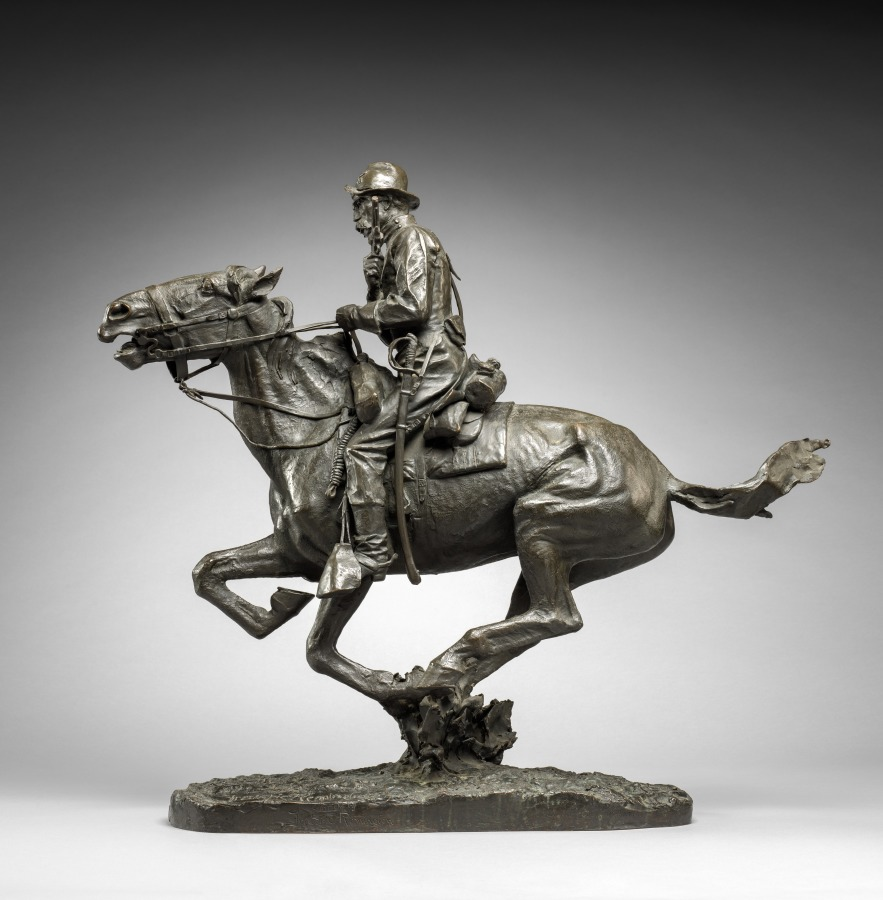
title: Trooper of the Plains-1868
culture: America, early 20th Century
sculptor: Frederic Remington (American, 1861–1909)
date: modeled 1908, cast c. 1911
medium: bronze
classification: Sculpture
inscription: Signed on top of base: Frederic Remington; Inscribed on side of base: Copyright by Frederick Remington, Roman Bronze Works, N.Y.; numbered underneath base: 3